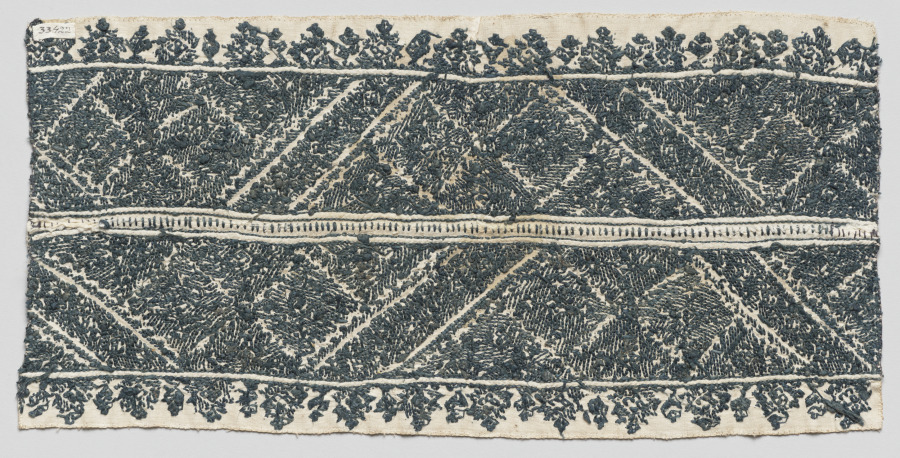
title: Fragment of a furnishing textile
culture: Africa, North Africa, Morocco, Fes, Moroccan embroiderer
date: 1800s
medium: Cotton, silk, dye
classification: Embroidery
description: The dense blue embroidery on this fragment is associated with the city of Fes, and was likely part of a larger textile used to decorate the interior of a Moroccan home. It might have been used as a cover for a pillow or low sofas lining the walls of a sitting room. Historically, some of these textiles were described as "Aleuj" (a pejorative term loosely translating to 'convert') and thought to be made by Circassian women from the Caucasus region in western Asia.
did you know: This textile was purchased in 1933 from the "A Century of Progress International Exposition," better known as the Chicago World's Fair.